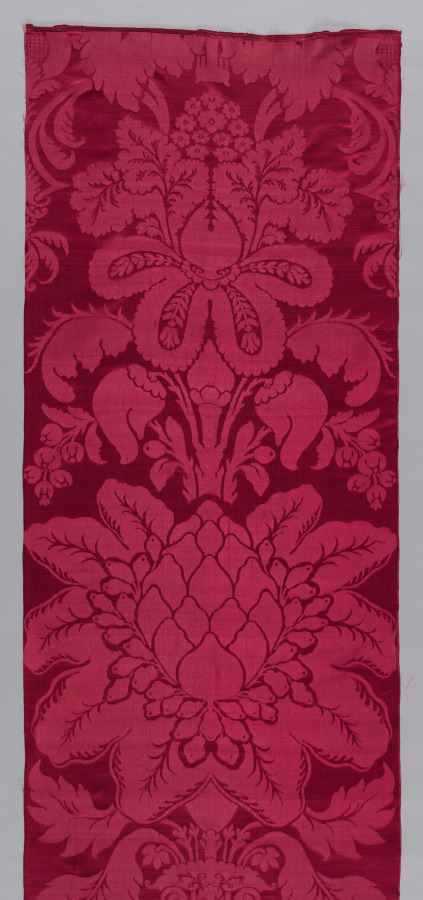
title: Two Large Damask Cloths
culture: Italy, 17th century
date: 1600s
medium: damask, silk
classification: Textile